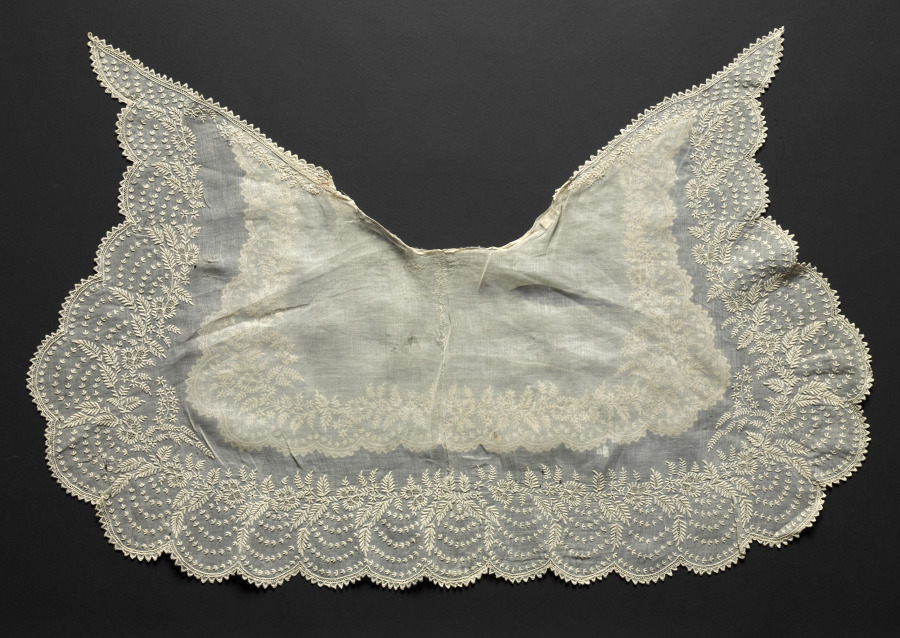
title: Double Collar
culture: United States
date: 1830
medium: Plain weave cotton, embroidered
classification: Embroidery